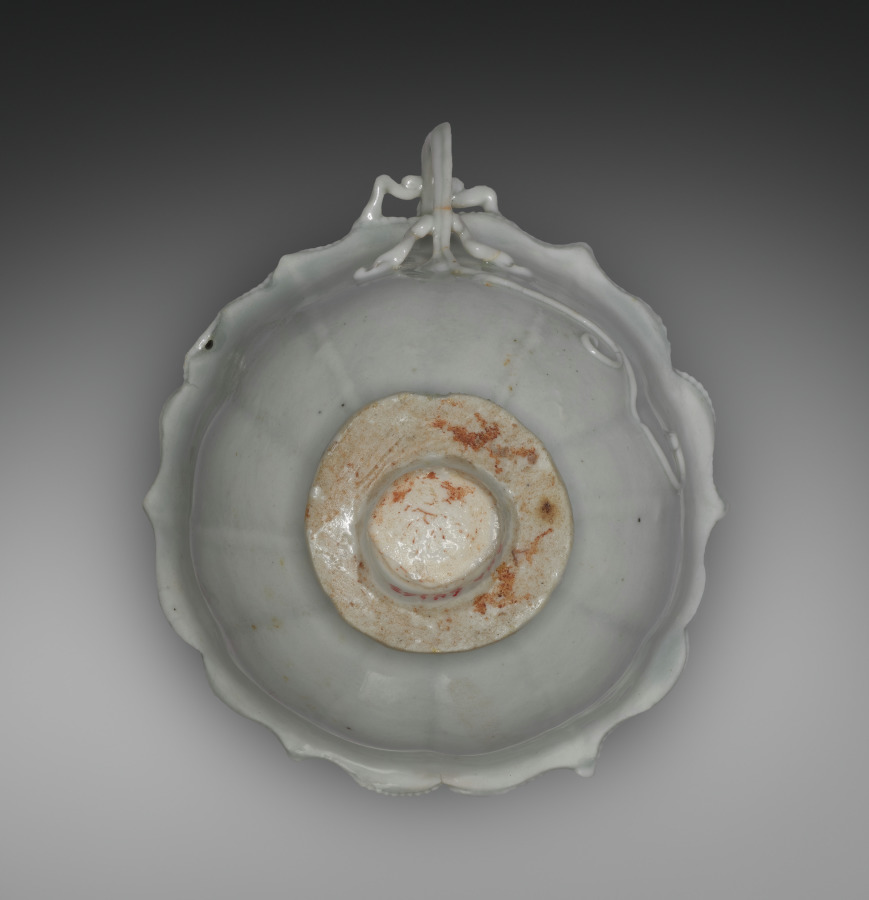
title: Fluted Cup with Dragon Handle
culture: China, Jiangxi Province, Jingdezhen kilns, Yuan dynasty (1271–1368)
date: early 1300s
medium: Glazed porcelain, Qingbai (bluish-white) ware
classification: Ceramic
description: Very thinly potted, the subtly lobed body of this cup is almost translucent. The thin, slightly opaque, light greenish glaze lends a sugary shine. Applied elements, including the handle, beaded borders, and sculptural floret, are constructed and glazed with the same materials as the body, providing a seamless blend of form and decorative embellishment. The result is an evocative reminder of slightly earlier silver cups, also created in the form of flowers. This pristine, natural construction is challenged, however, by the archaic dragon that acts as the handle. Borrowed from the decoration found on much earlier bronzes, this added form illustrates the eclecticism of the Yuan, the attempt to blend present vision with interest in the past.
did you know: Clay beading divides the cup's interior into six foliate panels with a six-petaled flower at the junction of the beaded lines.